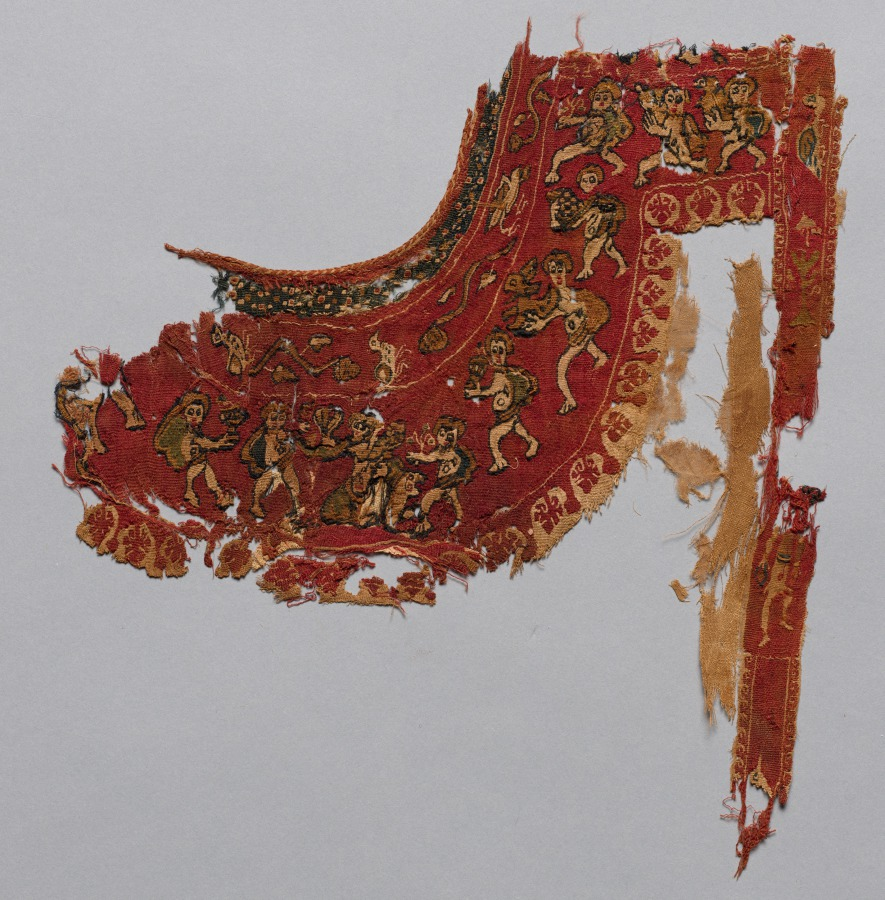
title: Neckband and Clavus from a Tunic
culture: Egypt, Umayyad period (661–750)?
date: 600s–700s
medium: Wool and linen: tabby weave, inwoven tapestry ornament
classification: Textile